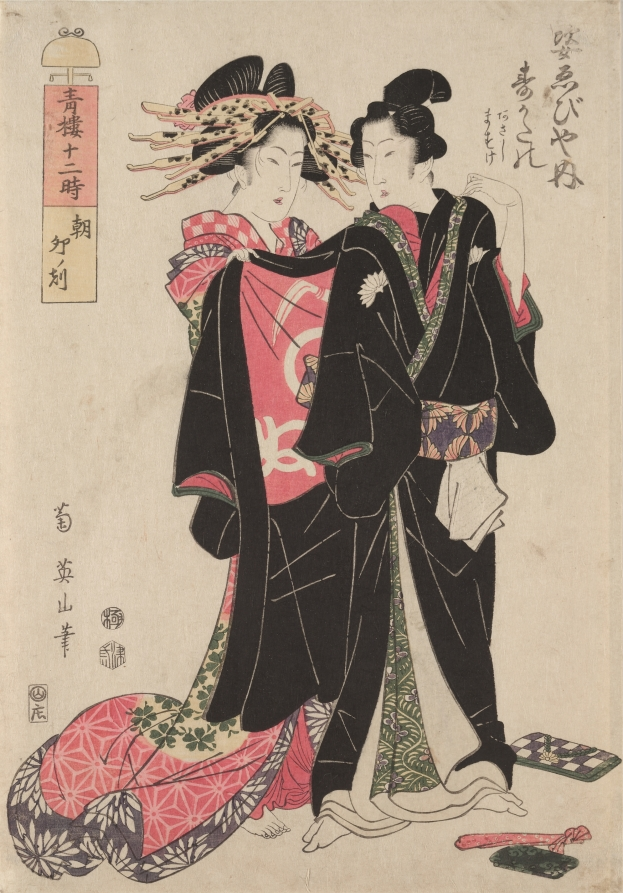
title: Sugatano of Sugata Ebisuya in the Morning, Hour of the Rabbit, from the series The Twelve Hours in the Pleasure Quarters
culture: Japan, Edo period (1615–1868)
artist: Kikukawa Eizan (Japanese, 1787–1867)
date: 1812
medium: Color woodblock print; ink and color on paper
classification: Print